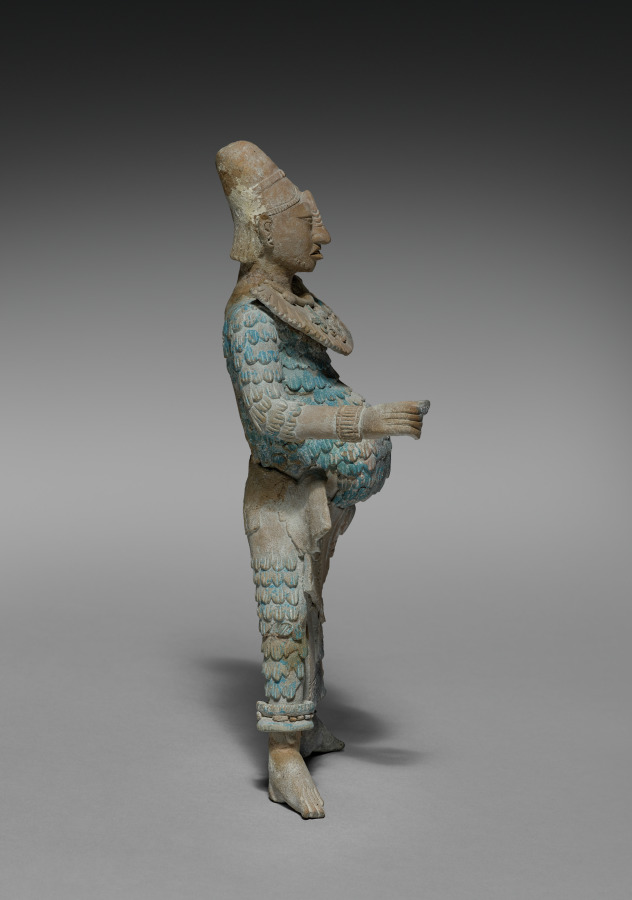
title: Warrior Figurine with Removable Headdress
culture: Mexico, Yucatán, Jaina Island region, Campeche, Maya style (250-900)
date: 600–900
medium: earthenware with pigment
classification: Sculpture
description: The major offerings placed in the Maya graves of Jaina Island were ceramic figurines, some of Mesoamerica's finest, that depict deities and humans in a variety of roles. This warrior, his headdress removable, once probably held weapons and wears either quilted cotton armor or the feathered uniform of a military order. We don't know why such figures are often pot-bellied.